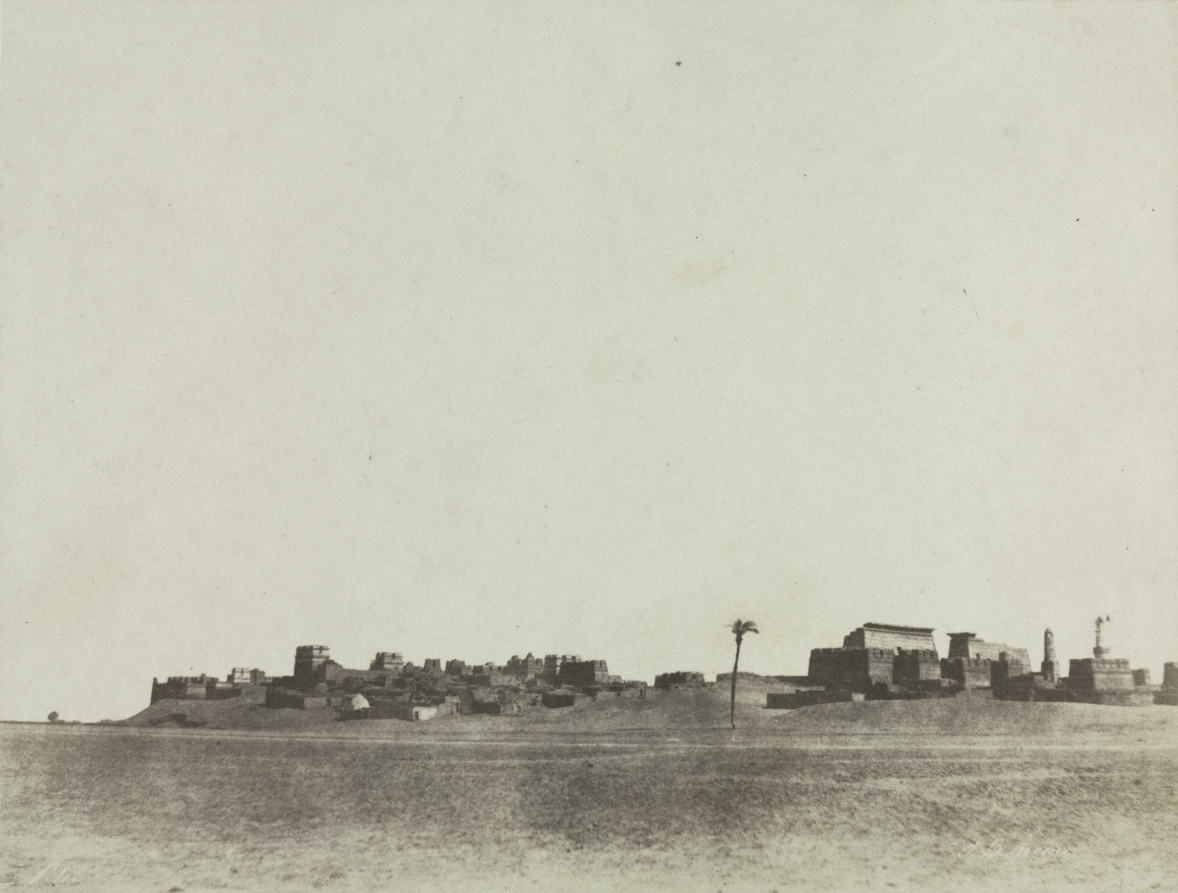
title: View of Luxor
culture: America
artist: John Beasley Greene (American, 1832–1856)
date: 1854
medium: salted paper print from waxed paper negative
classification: Photograph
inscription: Written on negative: "43", "J.B. Greene"; written in pencil on recto: "Vue de Luxor"; "7 [underlined]"; "43"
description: On the first of three trips to Egypt, John Beasley Greene created some 200 photographs. His work rarely documented favorite tourist sites in a conventionally descriptive manner; rather, he concentrated on poetic landscapes and archaeologically significant monuments. In this haunting photograph of Luxor, Greene's ability to depict expansive pictorial space is clearly evident. By surrounding the low, blocklike forms of the site's architecture with large vistas of vacant desert and sky, he emphasized a feeling of isolation and abandonment.